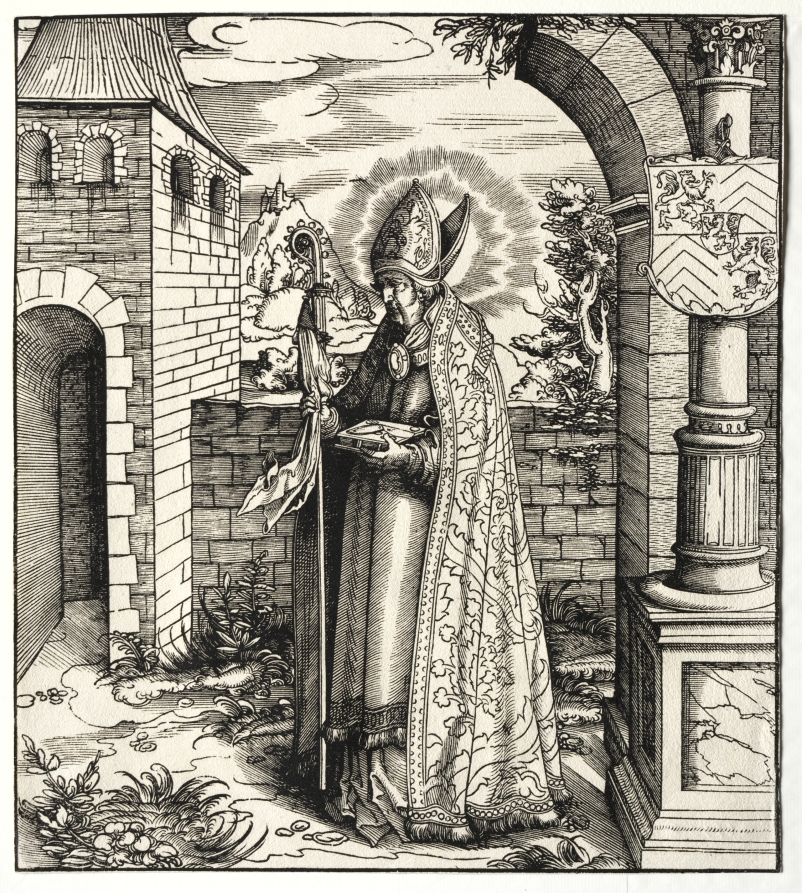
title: Saints Connected with the House of Hapsburg: A General Account of the Ancestry of Emperor Maximilian I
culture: Germany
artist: Leonhard Beck (German, c. 1480–1542)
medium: woodcut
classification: Print